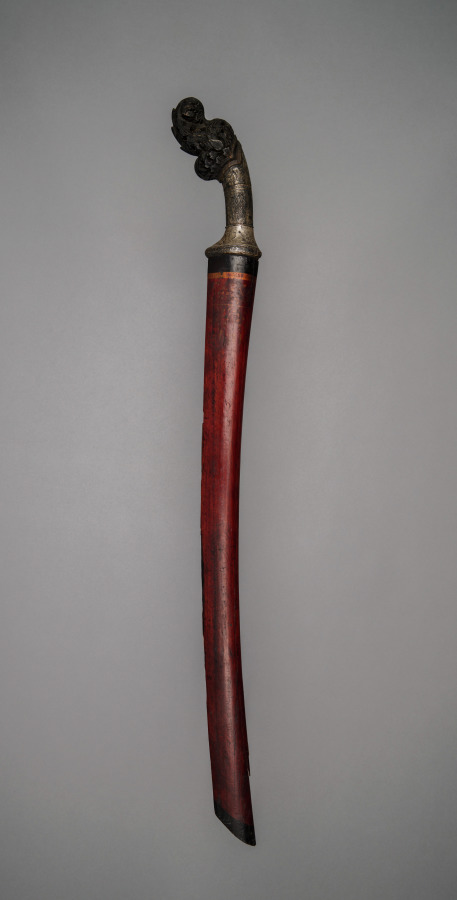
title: Sword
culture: Indonesia, Sulawesi (Celebes)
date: before 1918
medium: metal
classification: Arms and Armor